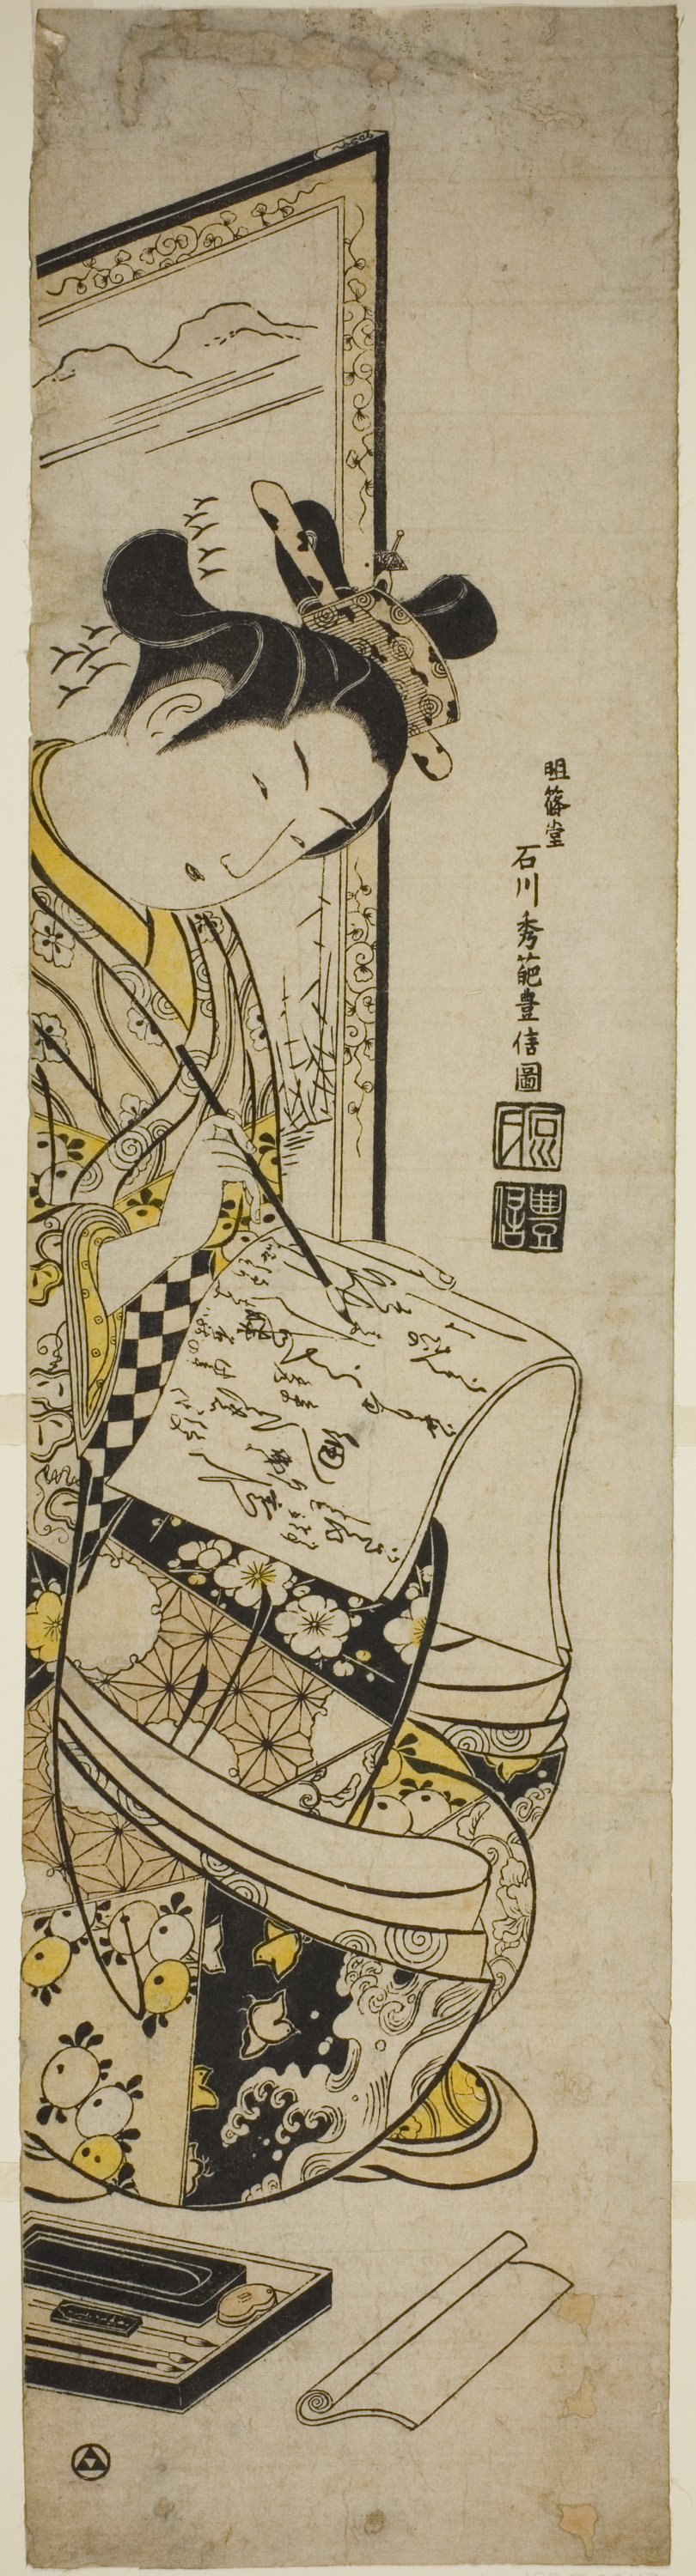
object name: Print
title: Woman Writing a Letter in Front of a Screen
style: Japanese (culture or style)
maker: Ishikawa Toyonobu (Japanese, 1711-1785)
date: early 1740s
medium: Hand-colored woodblock print; hashira-e, sumizuri-e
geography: Japan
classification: woodblock print; print; asian art